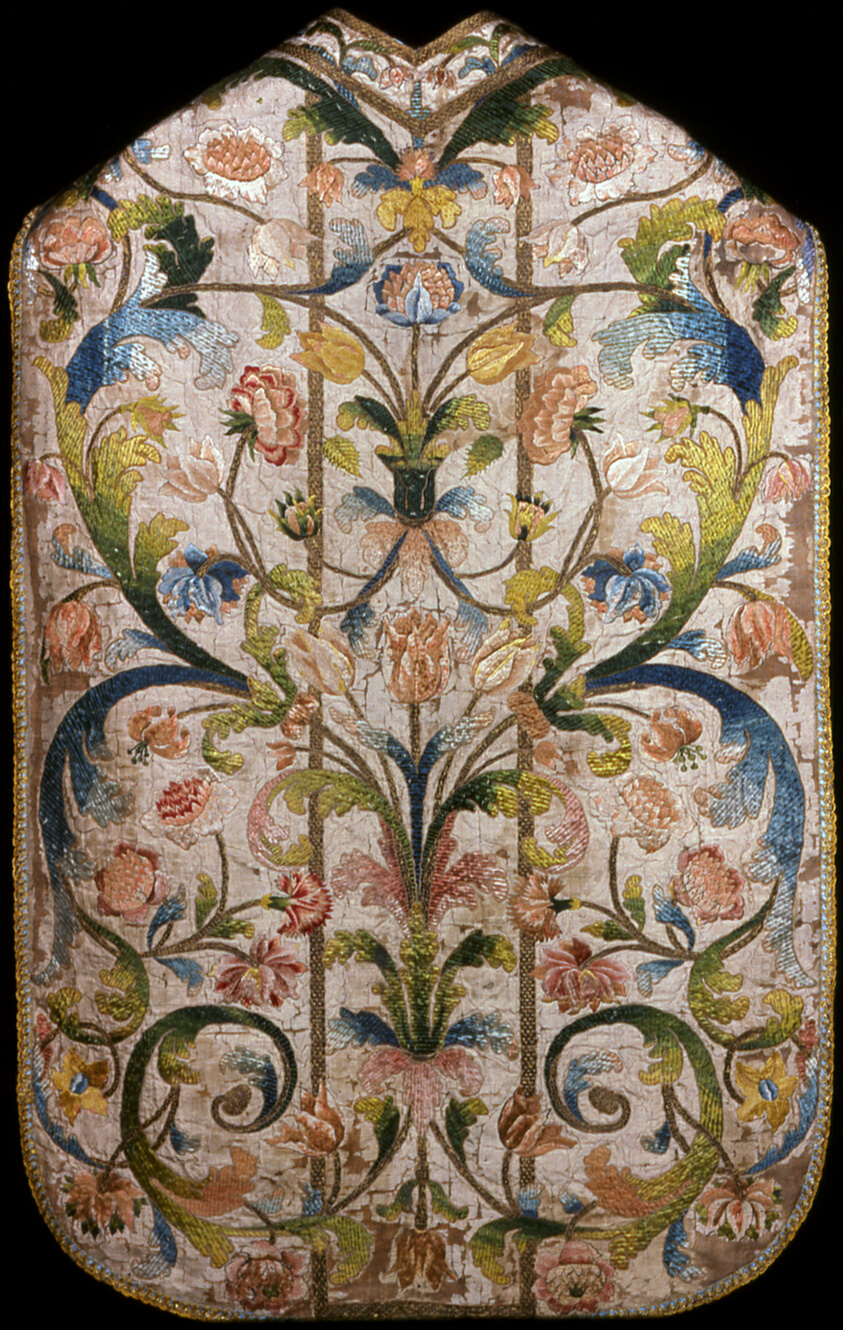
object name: Costume and Accessories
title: Chasuble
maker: Italy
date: 18th century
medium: Silk, plain weave; embroidered with silk floss, silk-wrapped linen, and gilt-metal-strip-wrapped silk in satin stitch; couching; edged with silk, bobbin-made tape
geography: Italy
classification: textile; costume; chasuble; needlework (visual works); liturgical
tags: flowers, yellow (color), tulips, scrolls (motifs), pink (color), peonies, lilies, green (color), foliage, crosses, blue (color)